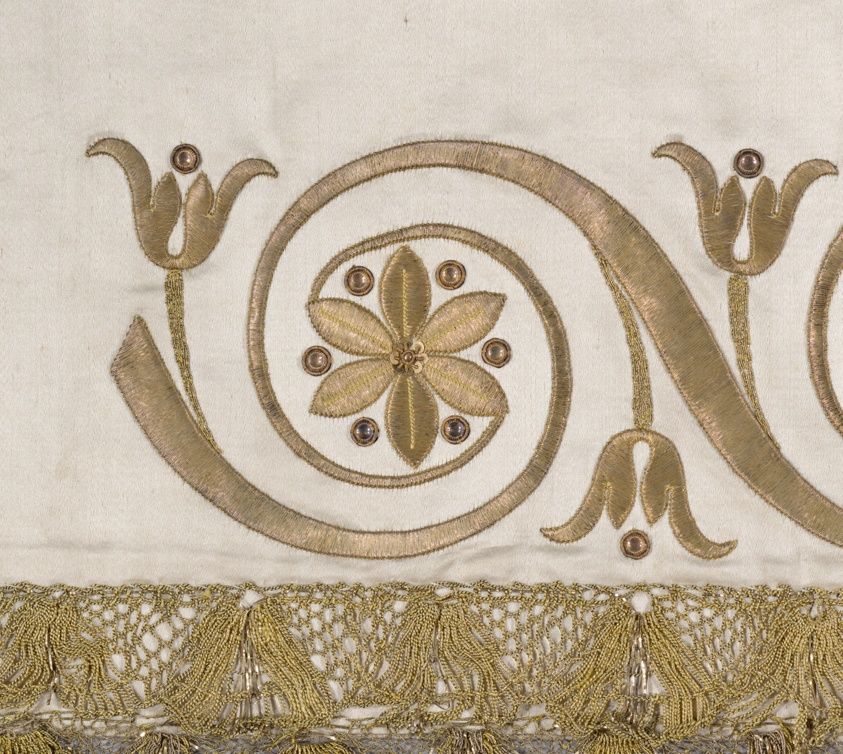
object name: Costume and Accessories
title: Skirt from a Court Gown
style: 19th century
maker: France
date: 1805-15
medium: Silk, satin weave; embroidered with gold metal-wrapped over a silk fibre core, gold frisé, silk, gold metal formed ornaments, "purl," spangles, gold metal strips; couching over paper core and silk padding, in pattern and backstitch; trimmed with bobbin lace made of gold metal strip wound around a silk fibre core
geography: France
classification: textile; needlework (visual works); costume; costume - embroidery; skirt (garment)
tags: lilies, flowers